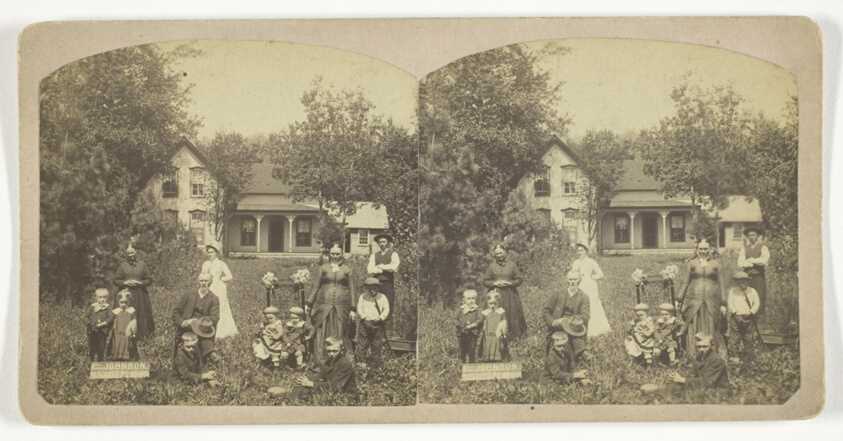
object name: Photograph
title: Untitled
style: 19th century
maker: Martin Morrison (American, 1844-1916)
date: August 21, 1888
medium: Albumen print, stereo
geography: Ames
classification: photography; photograph